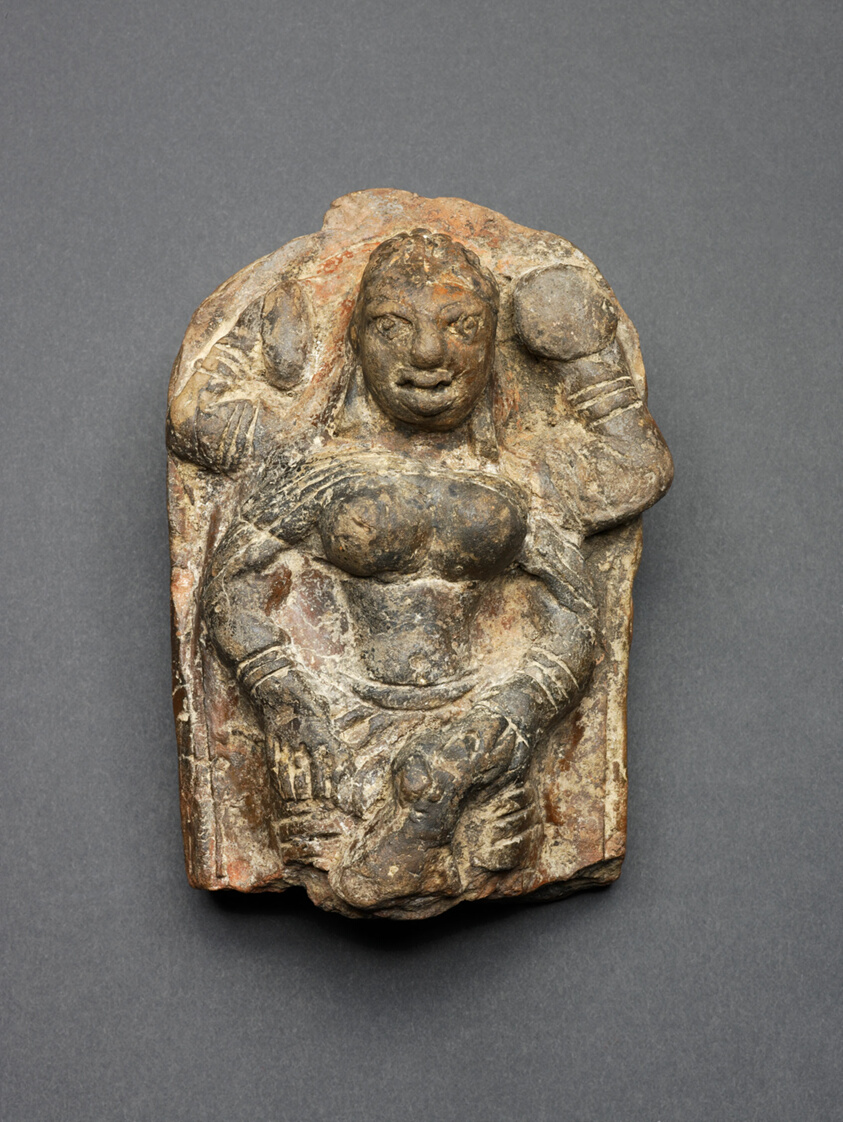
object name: Sculpture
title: Goddess Durga Slaying the Buffalo Demon (Mahishasuramardini)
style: South Asian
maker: India; Uttar Pradesh, Mathura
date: Kushan period, 2nd century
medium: Molded terracotta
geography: Mathura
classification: earthenware; ceramics; sculpture; asian art